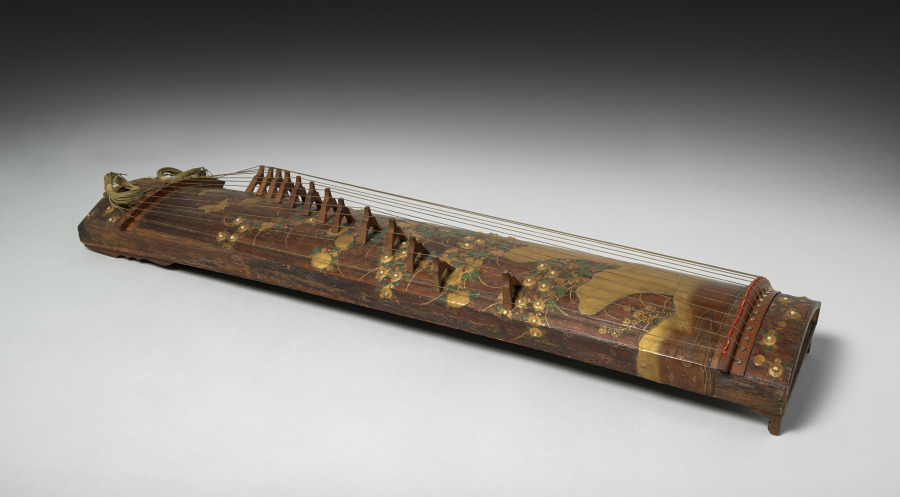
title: Koto (Zither)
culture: Japan, Edo period (1615–1868)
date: early to mid-1800s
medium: Wood with colored lacquer, sprinkled gold powder (maki-e), textile, and silk strings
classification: Musical Instrument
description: This koto has an elaborately decorated surface, suggesting that it was meant to be admired as a decorative object rather than played as a musical instrument. The vertical design shows a profusion of chrysanthemum flowers and miscanthus grass above a brushwood fence as well as a pair of butterflies.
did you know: The koto descended from the guzheng, a Chinese zither first imported to Japan in the seventh century.